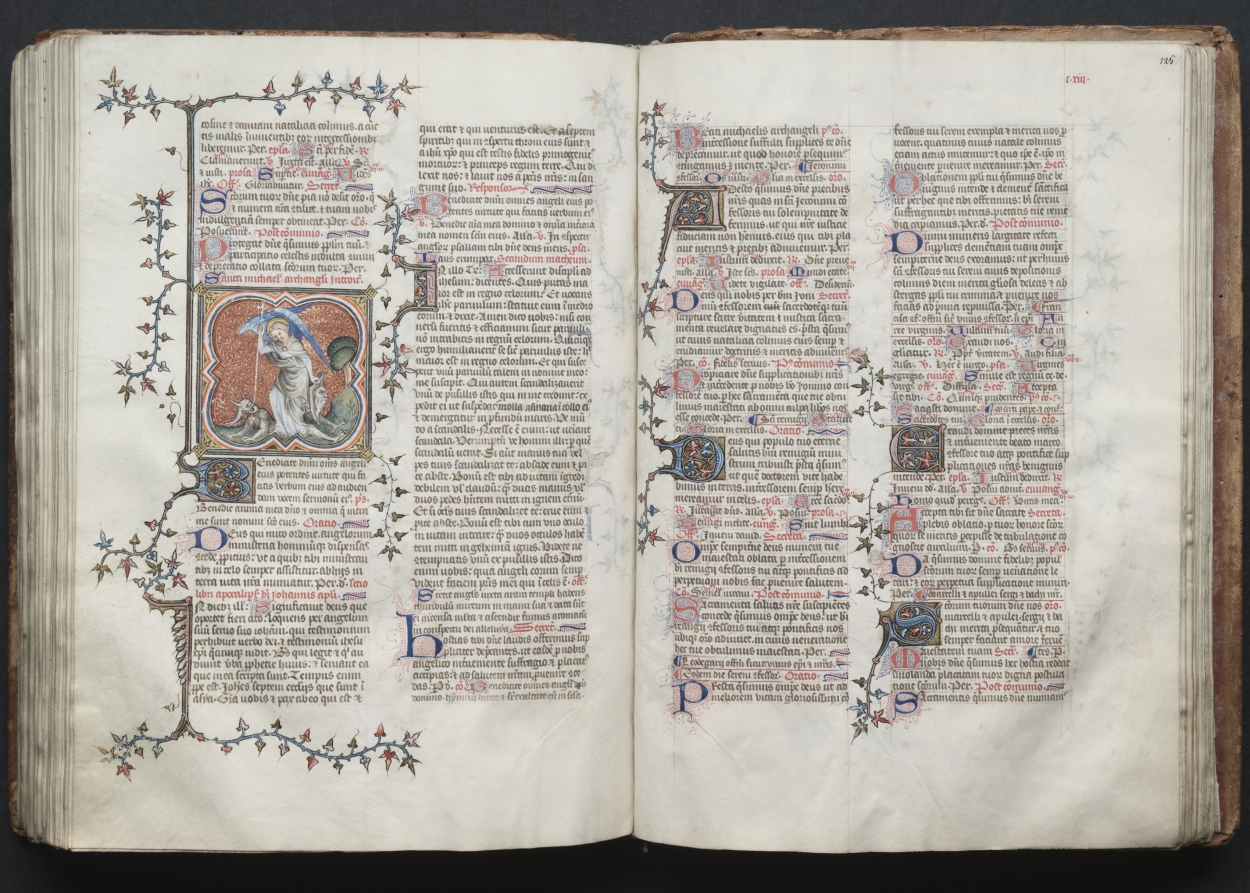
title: The Gotha Missal: Fol. 125r, Text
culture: France, Paris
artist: Master of the Boqueteaux (French)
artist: and Workshop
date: c. 1375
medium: ink, tempera, and gold on vellum; blind-tooled leather binding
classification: Bound Volume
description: The style and quality of this manuscript's decoration is typical of deluxe Parisian books made for aristocratic or royal patrons. Most of the book's decoration appears to be the work of the Master of the Boqueteaux, an artist active at the court of King Charles V (died 1380). His style was apparently shared by a number of book illuminators working in and around Paris. It is very possible that the Gotha Missal belonged to Charles V, but is not provable because the manuscript has no royal portraits and lacks a colophon. Given the book's magnificent decoration, however, it would seem that it was produced for a Valois prince, if not for the king himself. The manuscript receives its name from the German dukes of Gotha, its later owners.